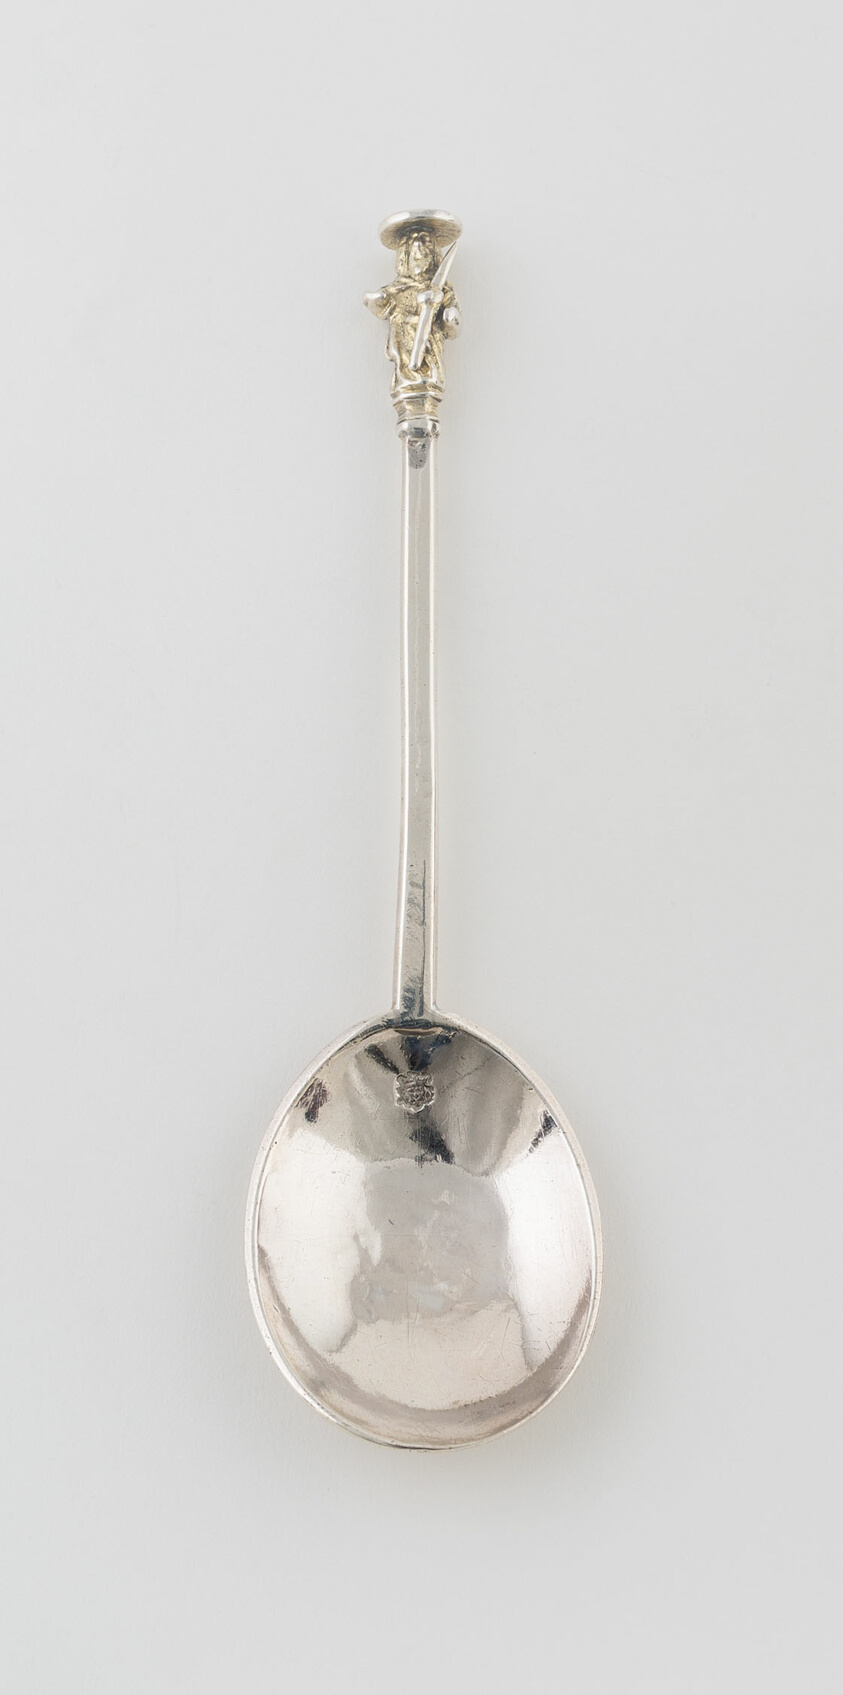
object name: Metalwork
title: Apostle Spoon: St. Thomas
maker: London, England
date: 1647/48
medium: Silver; figure gilded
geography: London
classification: silver; metalwork; european decorative arts